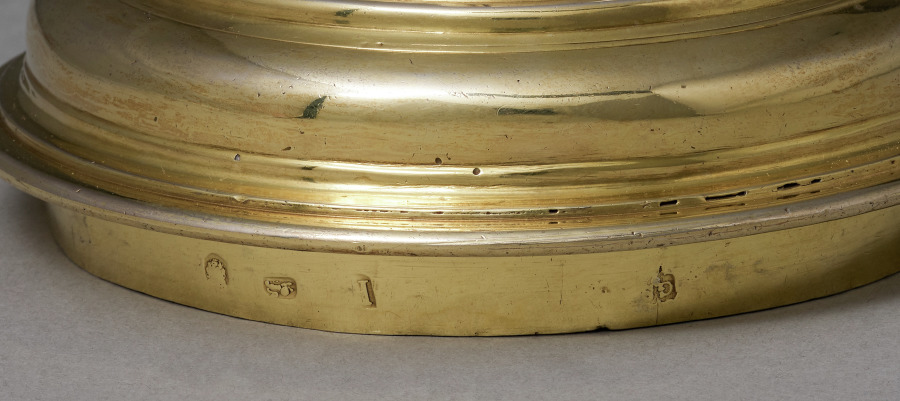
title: Covered Cup (cover)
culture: England, London, 18th century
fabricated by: Gabriel Sleath (British, 1674–1756)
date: 1723–1724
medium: silver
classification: Silver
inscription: engraved in the center of the cup is a demi-lion, rampant passant, holding an unknown object on an irregularly shaped shield surrounded by baroque manteling. In style, it is appropriate for date of cup but does not appear a true coat of arms. On the lid is a crest consisting of a demi-lion, rampant passant, between open buffalo horns. These heraldic devices perhaps refer to some entity rather than an individual.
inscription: Hallmarks stamped on lid: "G", two unidentifiable, "H".